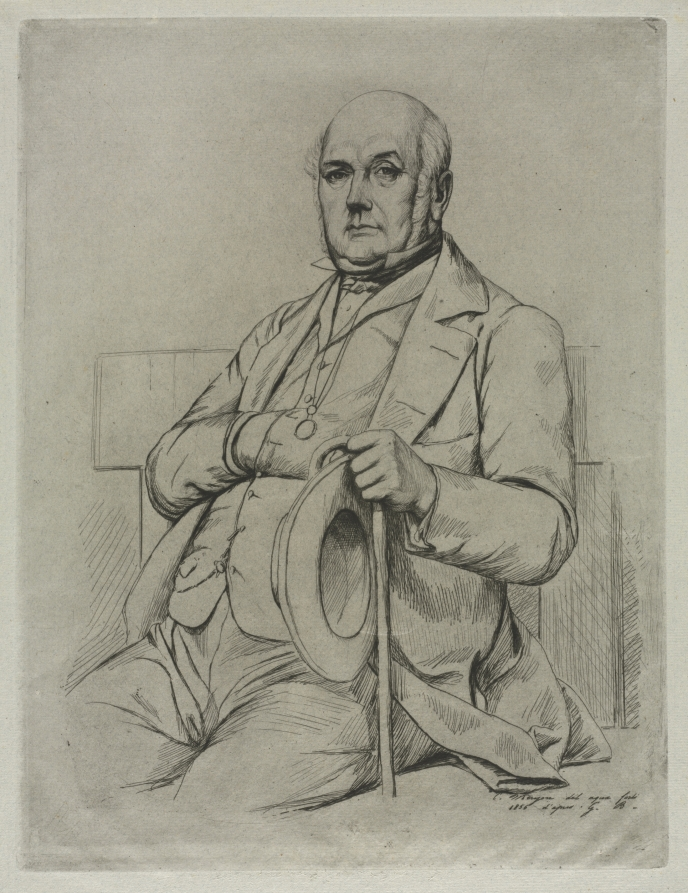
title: Casimir Le Conte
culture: France, 19th century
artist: Charles Meryon (French, 1821–1868)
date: 1856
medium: etching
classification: Print